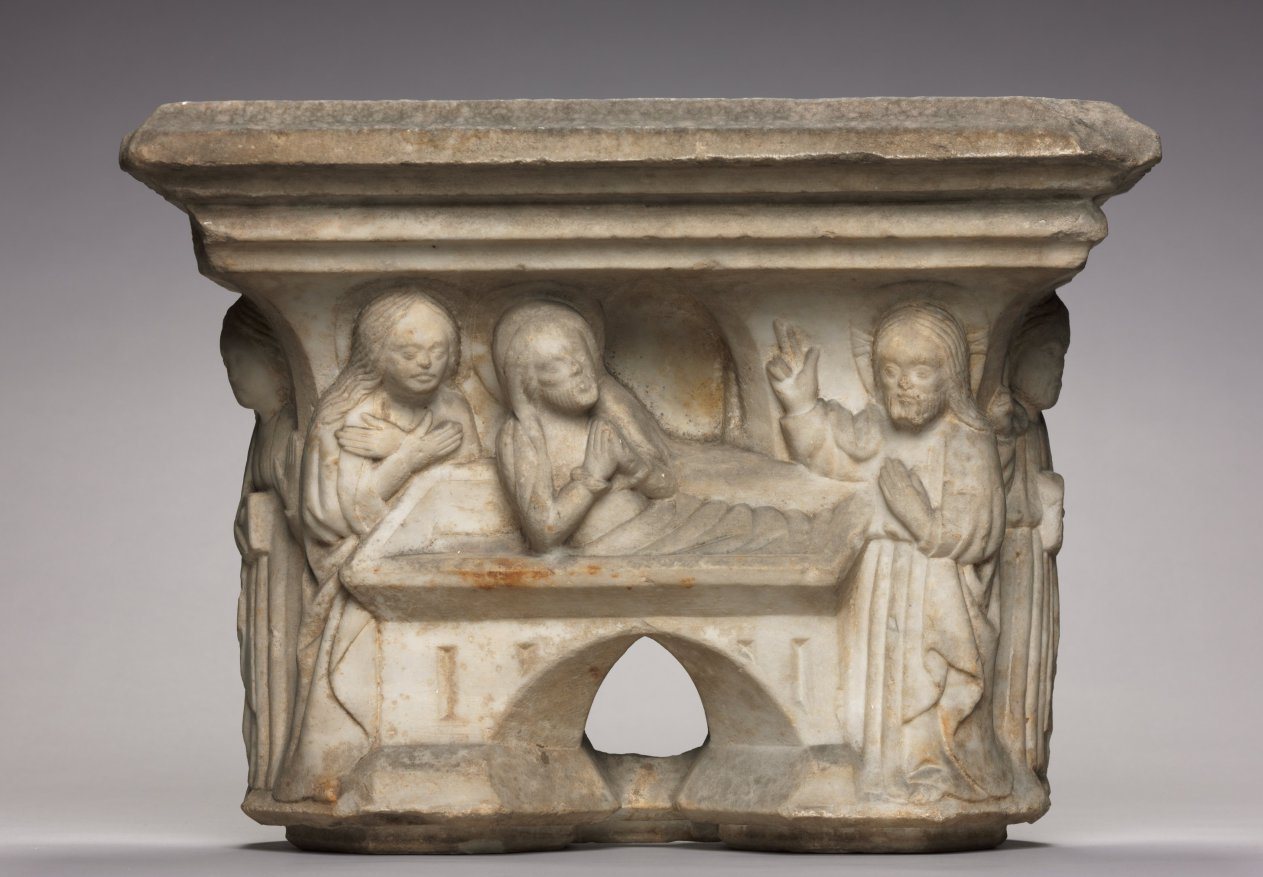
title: Engaged Capital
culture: Southern France, Abbey of Larreule, near Tarbes, 15th century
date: 1400s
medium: limestone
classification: Sculpture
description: This capital belongs to a surviving group including other architectural fragments that once decorated the cloister of the Abbey of Larreule. A cloister was a covered walkway or arcade, usually around all four sides of a square area of grass (the "cloister garth"). The seclusion of the cloister was the monks’ exclusive domain, off limits to others. Here, the monks were supposed to pray, study, meditate, and exercise in privacy and solitude. Such cloister capitals served both to instruct the monks and as a focus for their devotions. Other capitals in this series are installed in the Jardin Massey at Tarbes, near the original abbey. An arch from Larreule has been assembled with other associated French capitals at The Cloisters in New York.